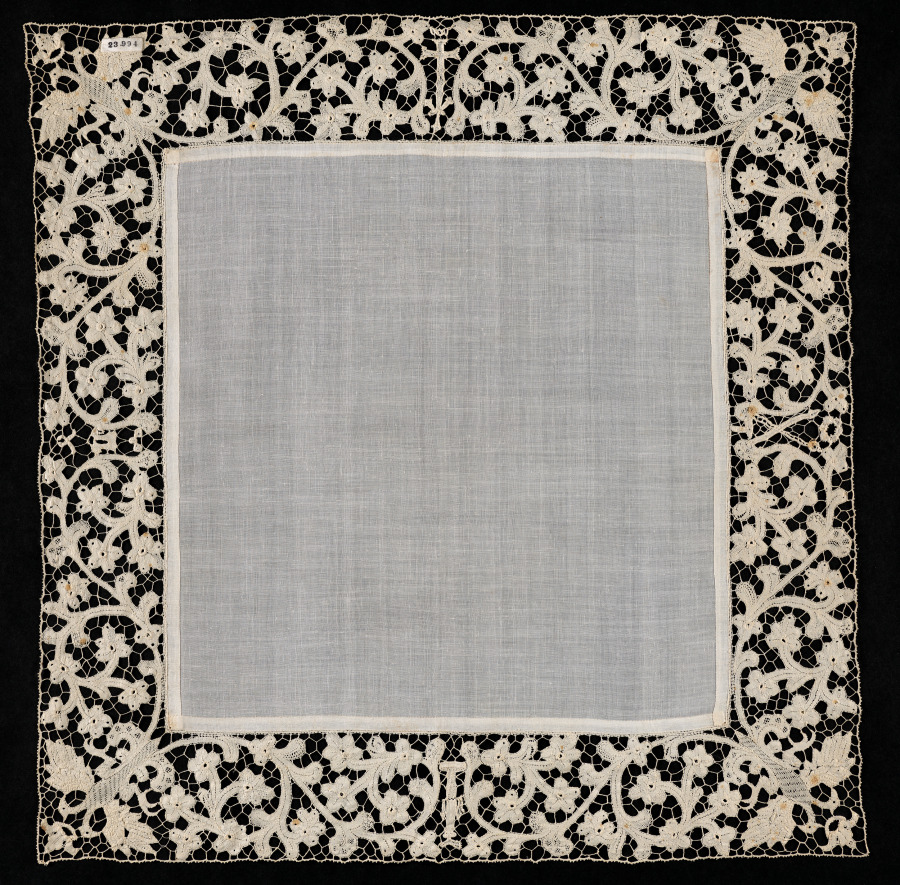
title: Chalice Veil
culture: Italy, Milan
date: 1600s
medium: lace, needlepoint and bobbin (Punto di Milano)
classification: Lace